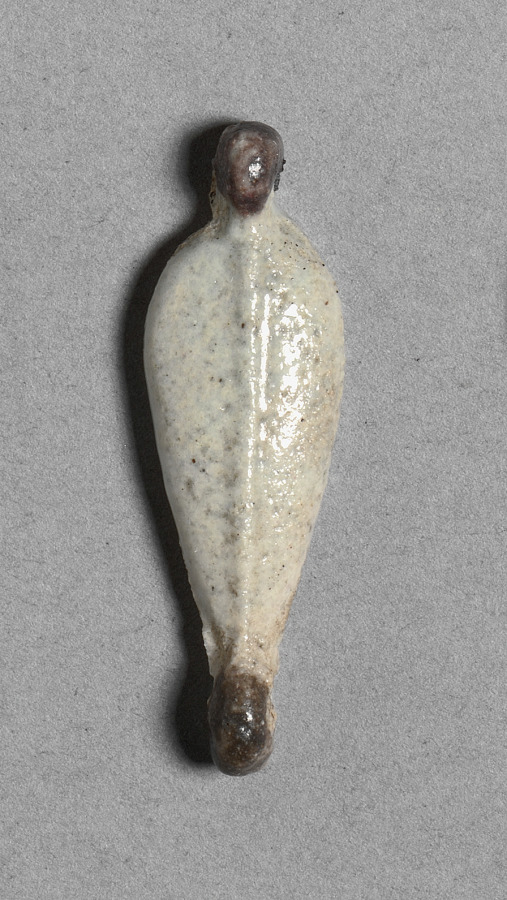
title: Petal-Shaped Bead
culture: Egypt, New Kingdom (1540–1069 BCE), Dynasty 18, reign of Amenhotep III (1390–1352 BCE)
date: c. 1391–1353 BCE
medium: faience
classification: Jewelry